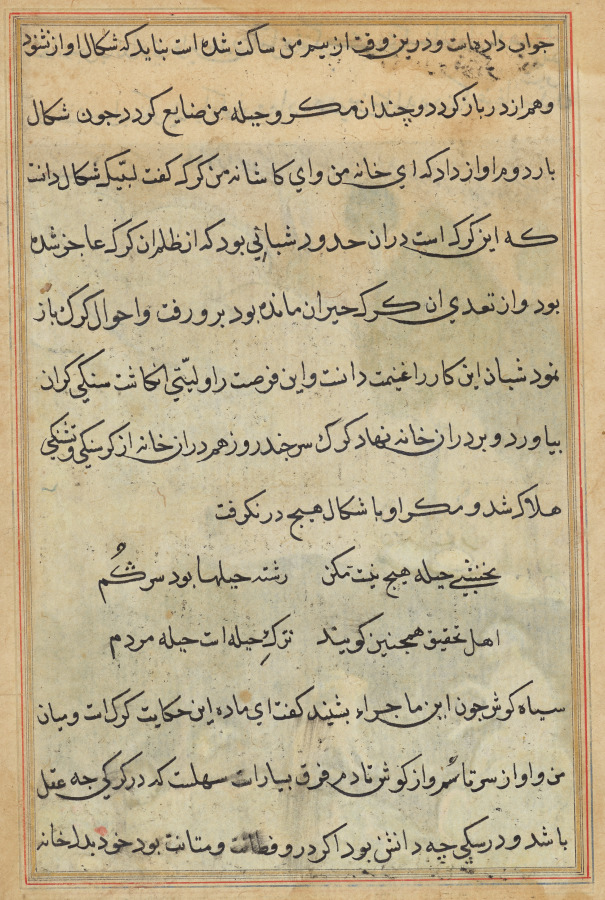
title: Tuti-Nama (Tales of a Parrot)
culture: Mughal India, court of Akbar (reigned 1556–1605)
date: c. 1560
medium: gum tempera, ink, and gold on paper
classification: Painting